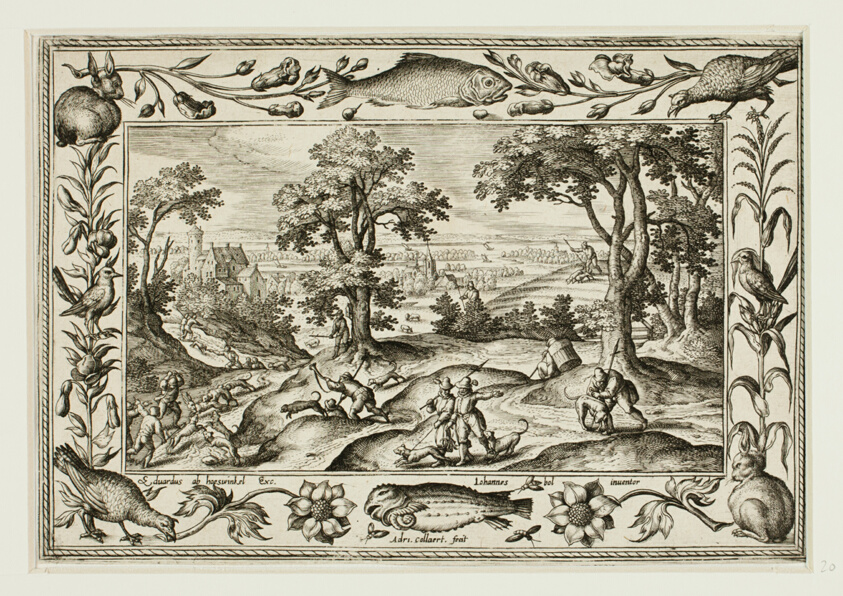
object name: Print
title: Hare Hunt, from Landscapes with Old and New Testament Scenes and Hunting Scenes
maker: Adriaen Collaert (Flemish, c. 1560–1618); after Hans Bol (Flemish, 1535–1593); published by Anna van Hoeswinckel (Flemish)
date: 1584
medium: Engraving in black on cream laid paper, laid down on cream laid paper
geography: Flanders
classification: engraving; paper; print; prints and drawing